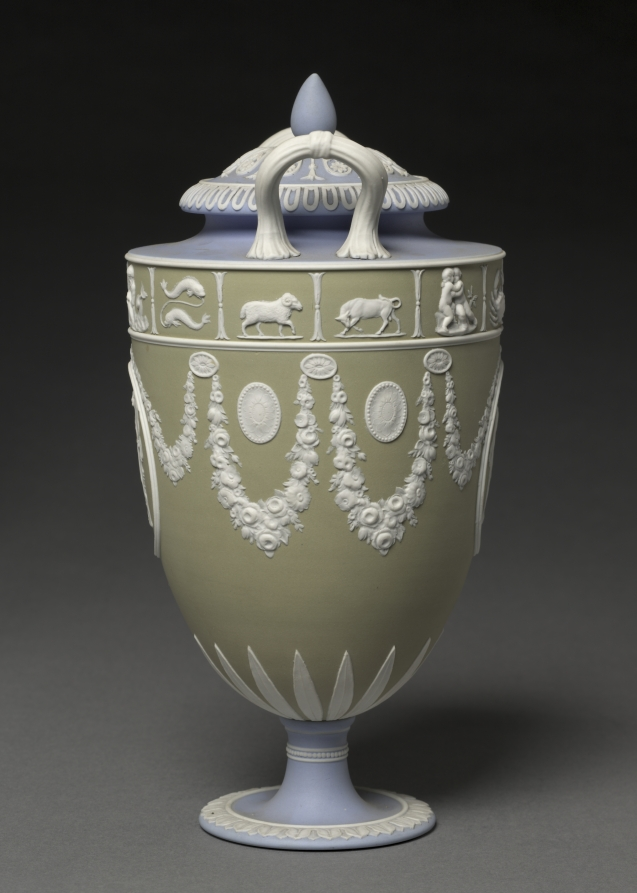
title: Covered Vase (one of a pair)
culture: England, Staffordshire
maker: Josiah Wedgwood and Sons (British, Staffordshire, est. 1759)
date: c. 1850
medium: jasper ware with relief decoration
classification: Ceramic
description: Wedgwood's tricolor jasperware first became popular in the 1770s during a period of fascination with neoclassical decoration. This vase was probably made around 1850 during the period when this type of decoration was revived. The relief medallions depict two versions of the Greek god Apollo, the god of music, next to his harp or lyre.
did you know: Signs of the zodiac form a decorative border around the upper portion of this vase.